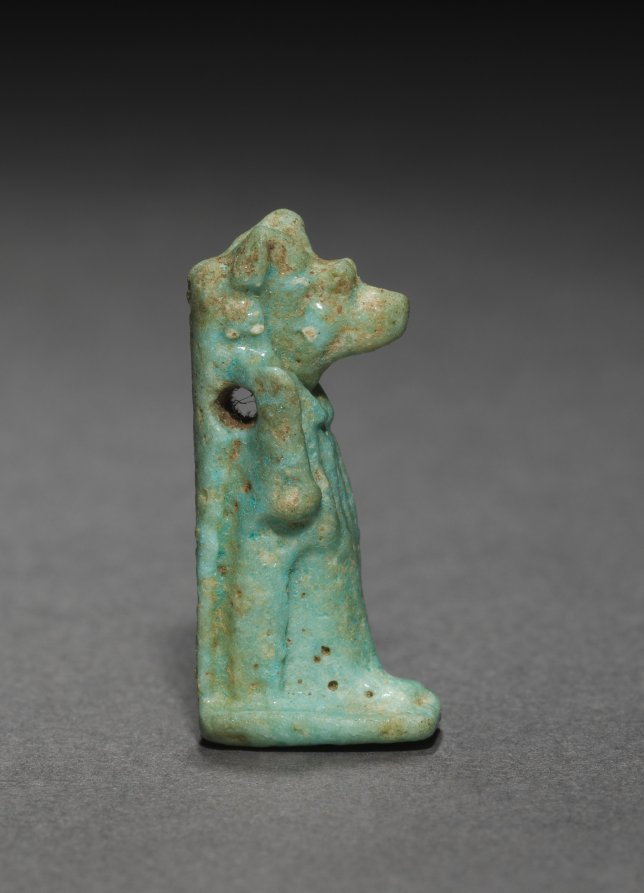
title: Amulet of Anubis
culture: Egypt, Greco-Roman period (332 BCE–395 CE), Ptolemaic dynasty (305–30 BCE)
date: 305–30 BCE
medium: light robin's egg blue faience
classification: Amulets